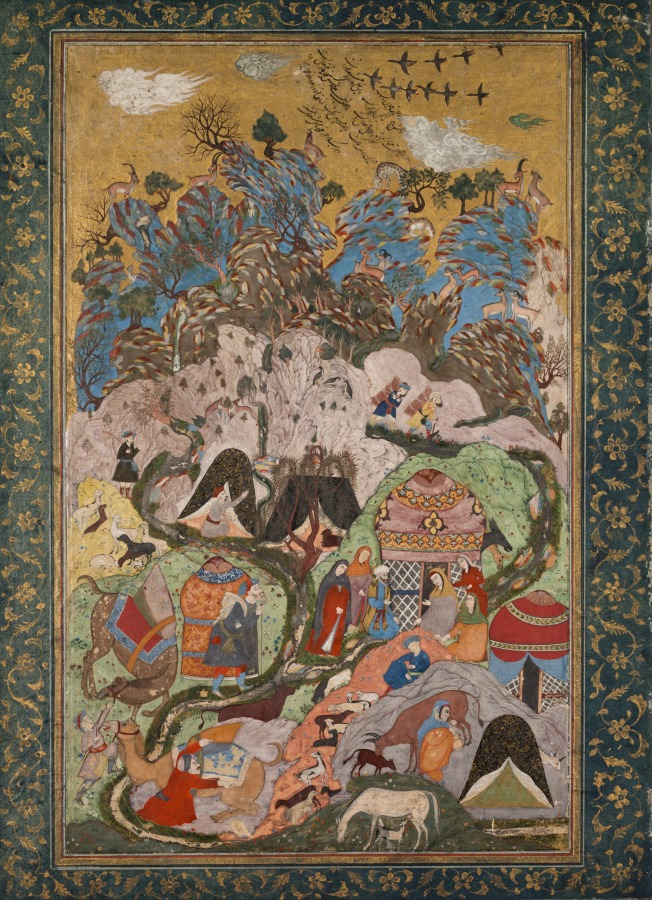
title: Encampment in the Mountains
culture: India, Kashmir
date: c. 1650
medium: color on paper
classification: Painting